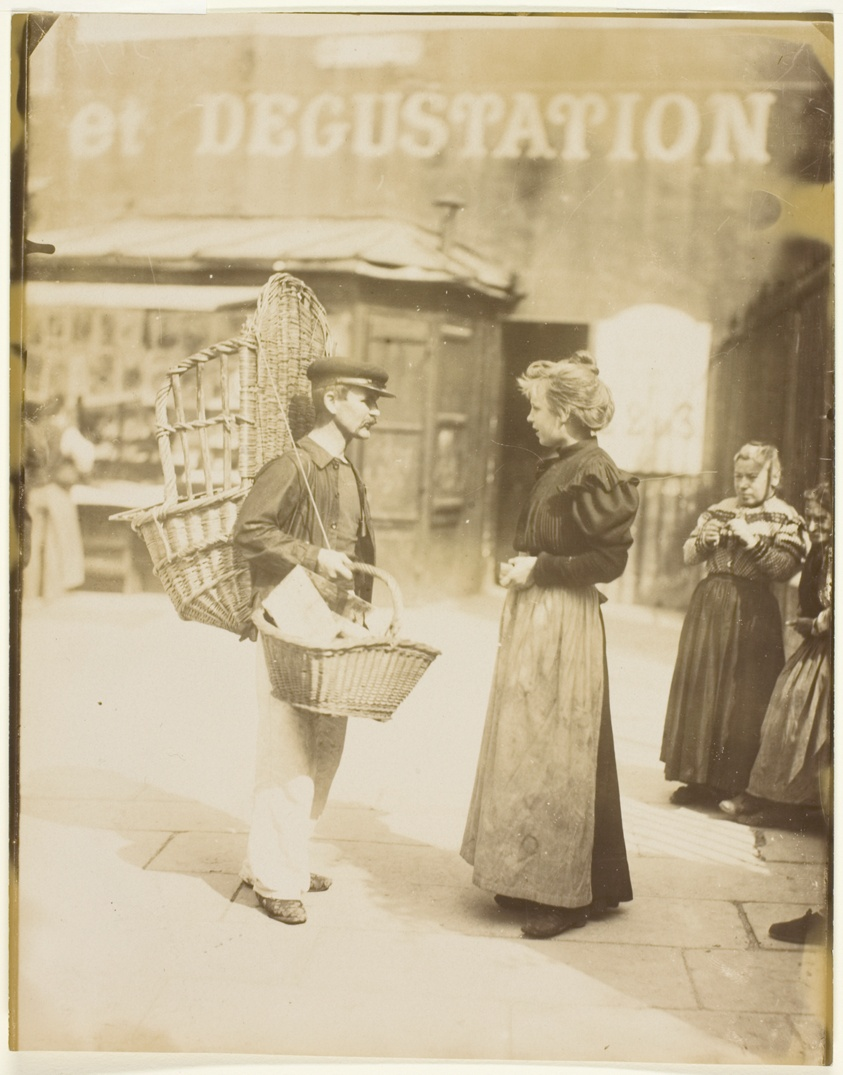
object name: Photograph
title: Marchand du Panier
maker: Jean-Eugène-Auguste Atget (French, 1857–1927)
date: 1899/1900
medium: Gelatin silver printing out print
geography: Libourne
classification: gelatin silver printing-out-paper print; photographic process; photography; photograph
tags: Paris